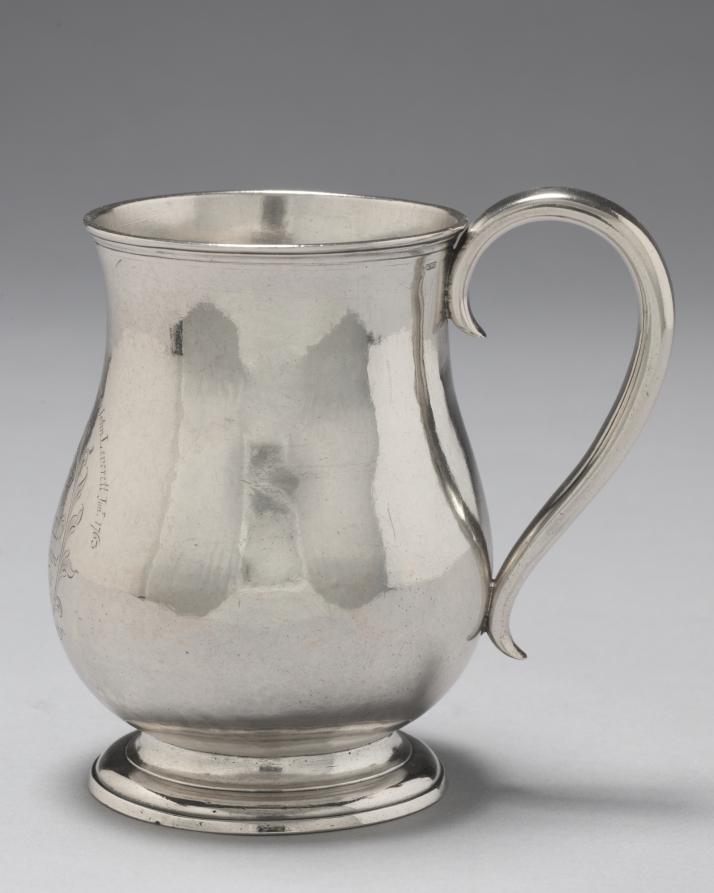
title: Cann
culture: America, Massachusetts, Boston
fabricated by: Jacob Hurd (American, 1702–1758)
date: 1747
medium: silver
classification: Silver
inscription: engraved within reserve on front, opposite handle: "A GIFT/From some of The/PRINCIPALL/ Officers in the regiment/of BOSTON to/Mr Adjutant/HUNT/1747." Above the reserve: "A Legacy left by Capt JABEZ HUNT to John Leverett Junr 1763."